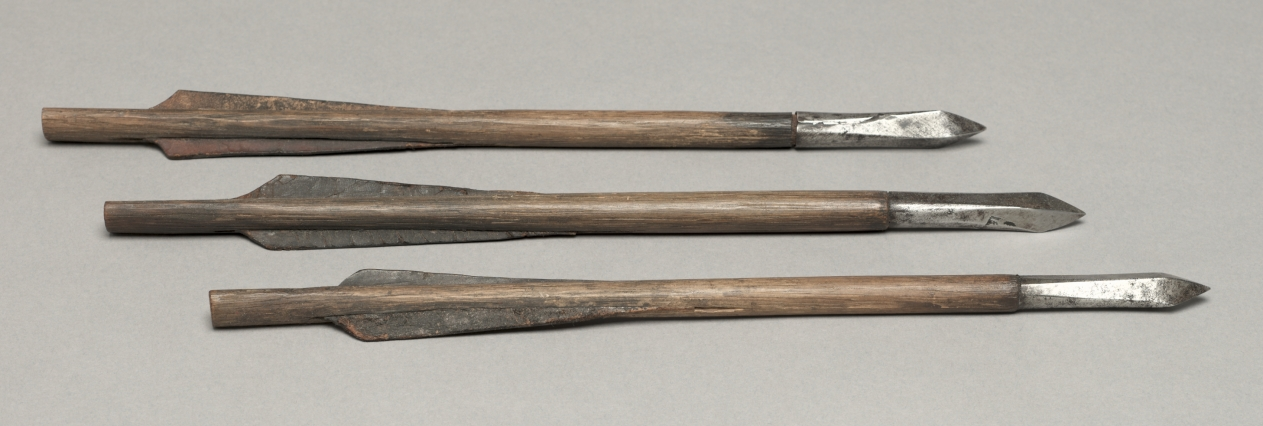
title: Crossbow Bolt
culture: Germany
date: 1500s–1600s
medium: wood, leather, steel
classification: Arms and Armor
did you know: Bolts with leather feathering were used mainly in the Tyrolean area, which includes northern Italy and western Austria.